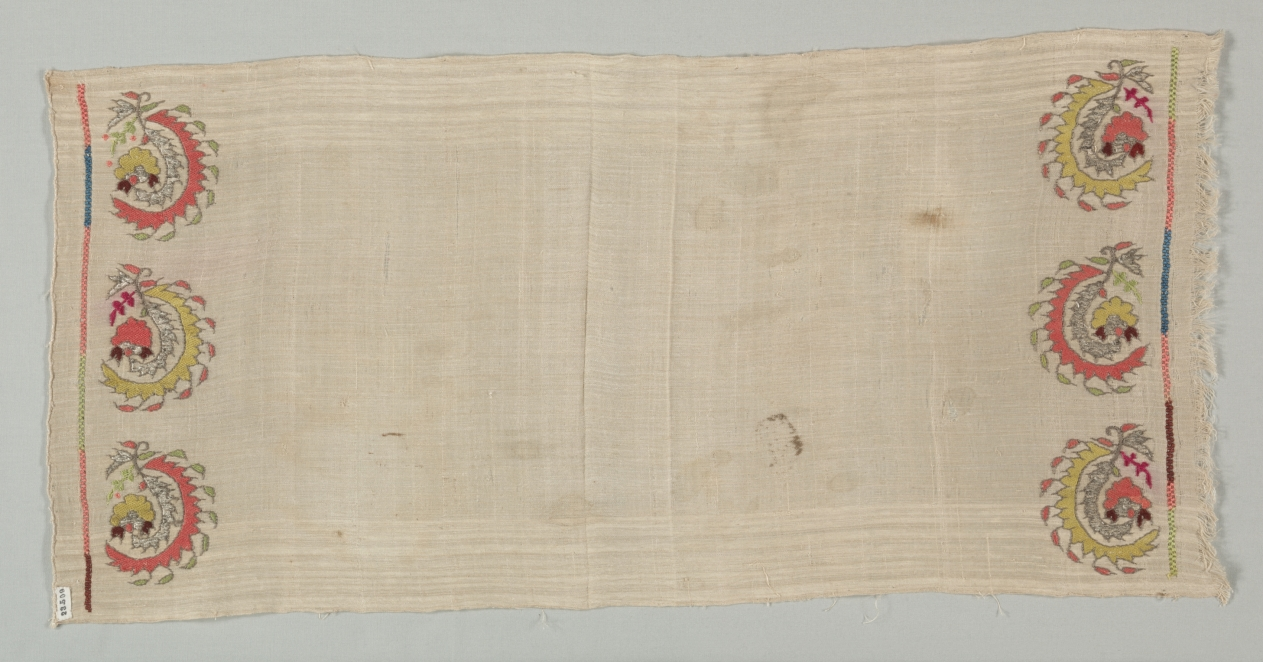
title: Embroidered Towel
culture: Turkey, 19th century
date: 19th century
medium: embroidery: silk and metal strips on linen tabby ground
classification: Embroidery